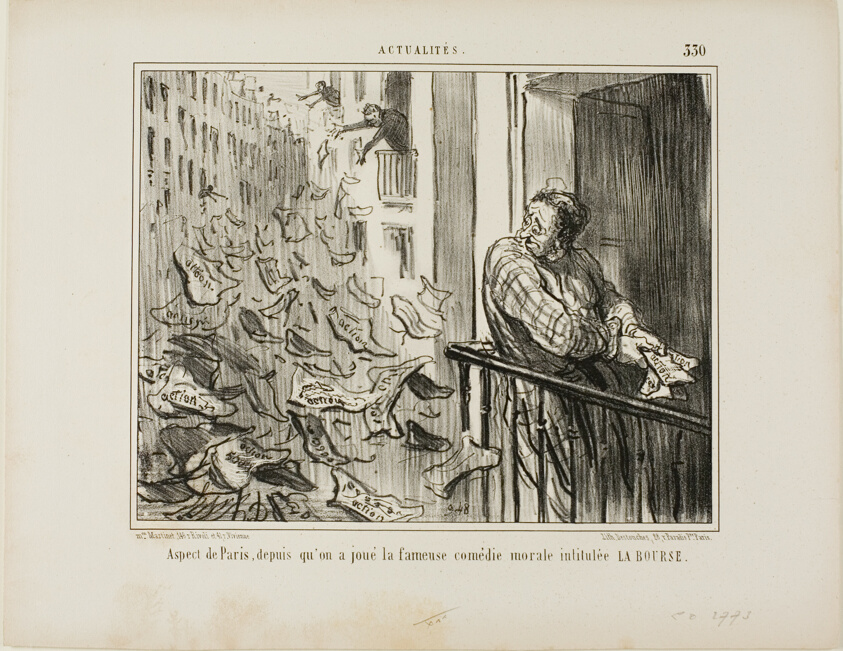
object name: Print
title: View Taken of the Streets of Paris after the Performance of the Famous Moralistic Comedy "La Bourse,” plate 330 from Actualités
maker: Honoré Victorin Daumier; French, 1808-1879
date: 1856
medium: Lithograph in black on ivory wove paper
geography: France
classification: lithograph; print; prints and drawing